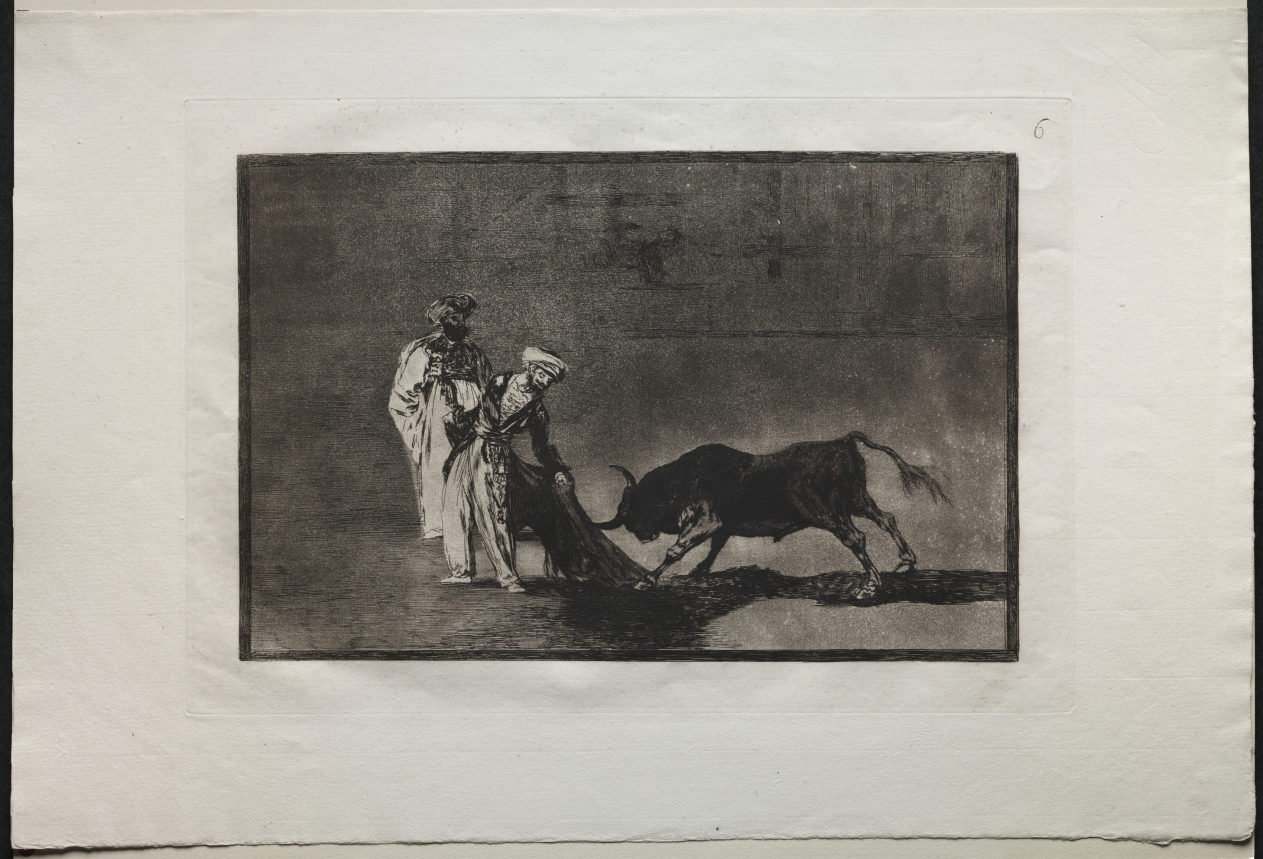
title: Bullfights: The Moors Make a Different Play in the Ring Calling the Bull with the Burnous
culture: Spain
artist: Francisco de Goya (Spanish, 1746–1828)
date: 1816, printed 1876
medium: engraving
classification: Print